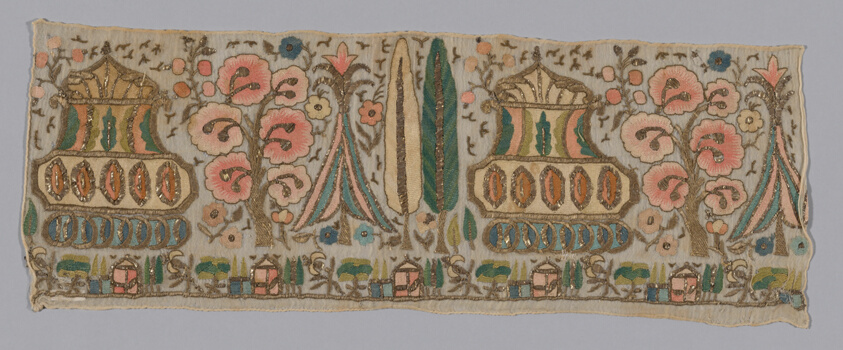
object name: Textile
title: Fragment (Towel End)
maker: Turkey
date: 19th century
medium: Embroidered in kiosk and cypress design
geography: Turkey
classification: textile; weaving; needlework (visual works)